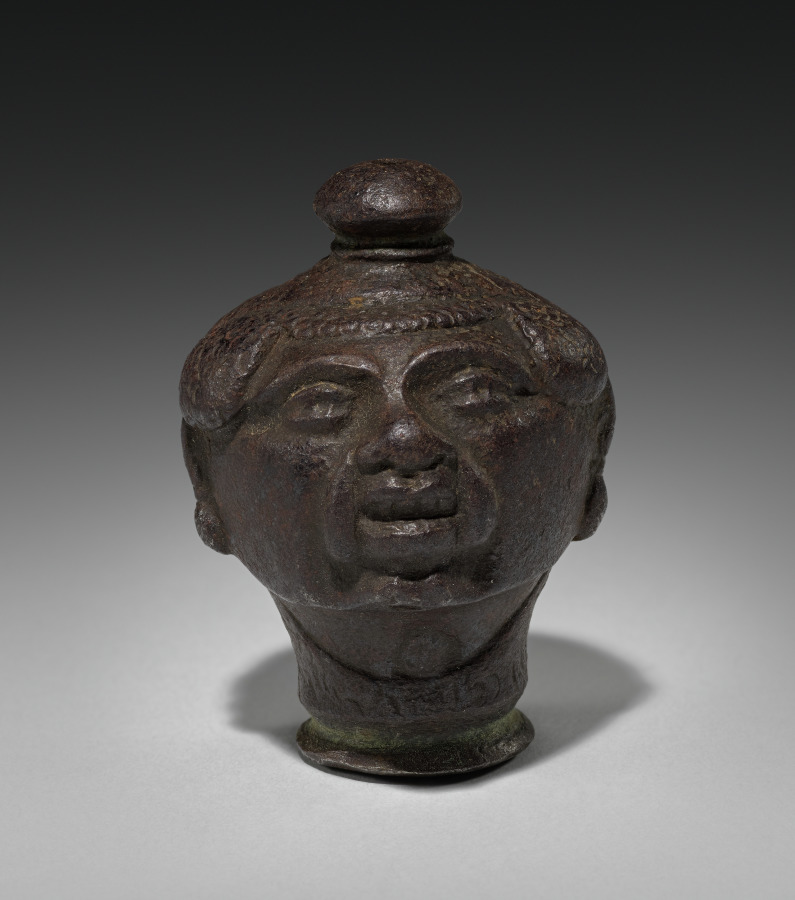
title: Pommel of Sword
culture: Italy, 17th century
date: 1600s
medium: steel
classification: Arms and Armor